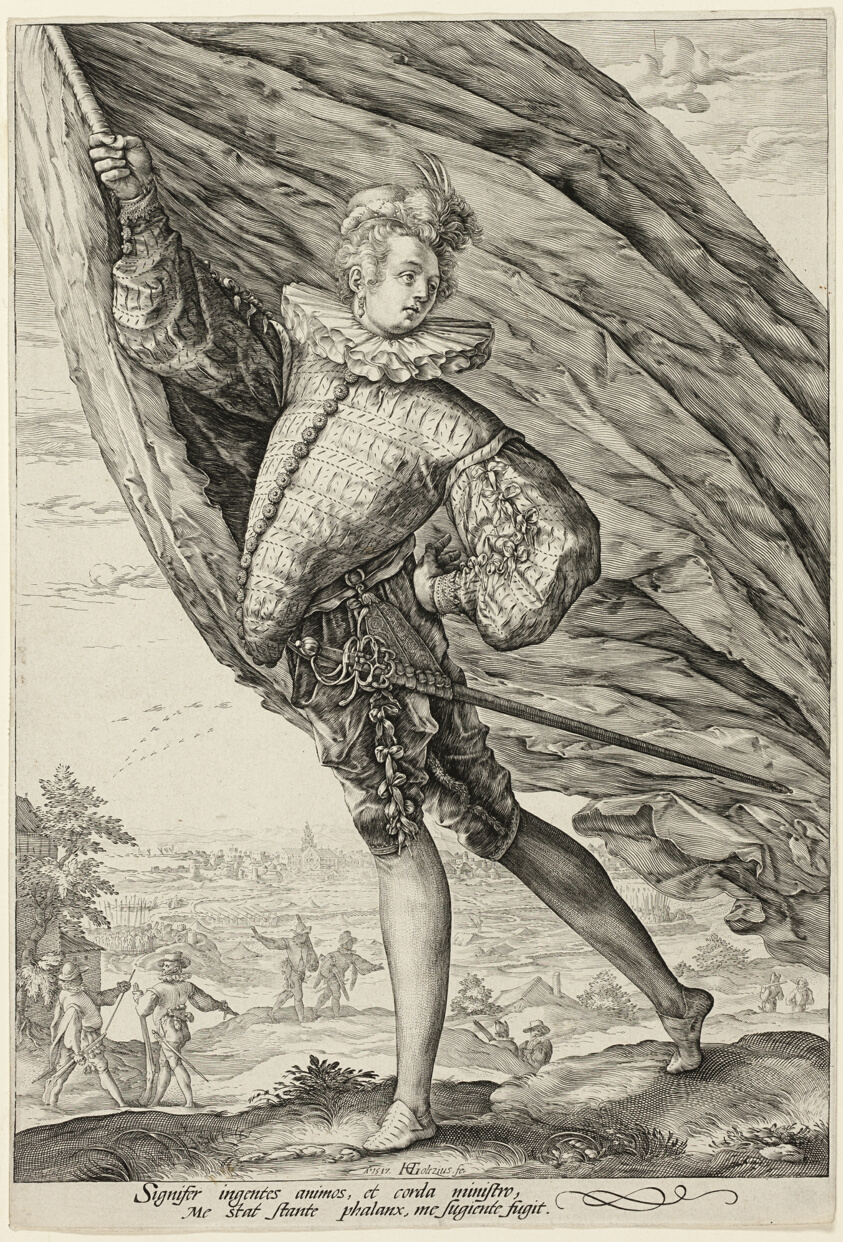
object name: Print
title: The Standard Bearer, Turned to Left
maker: Hendrick Goltzius (Dutch, 1558-1617)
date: 1587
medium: Engraving in black on ivory laid paper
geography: Netherlands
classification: engraving; print; prints and drawing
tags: war